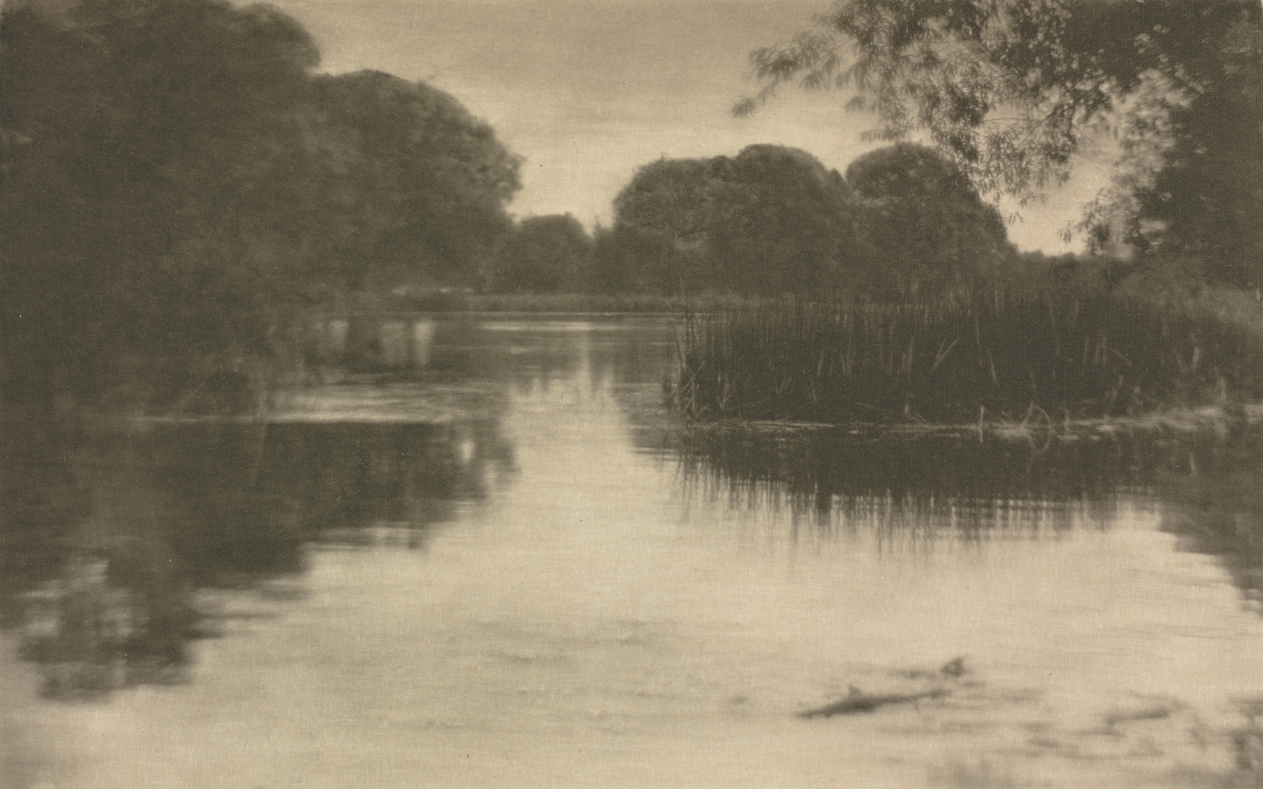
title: Camera Work: Bolney Backwater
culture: England, 20th century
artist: J. Craig Annan (British, 1864–1946)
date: 1910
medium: photogravure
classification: Bound Volume